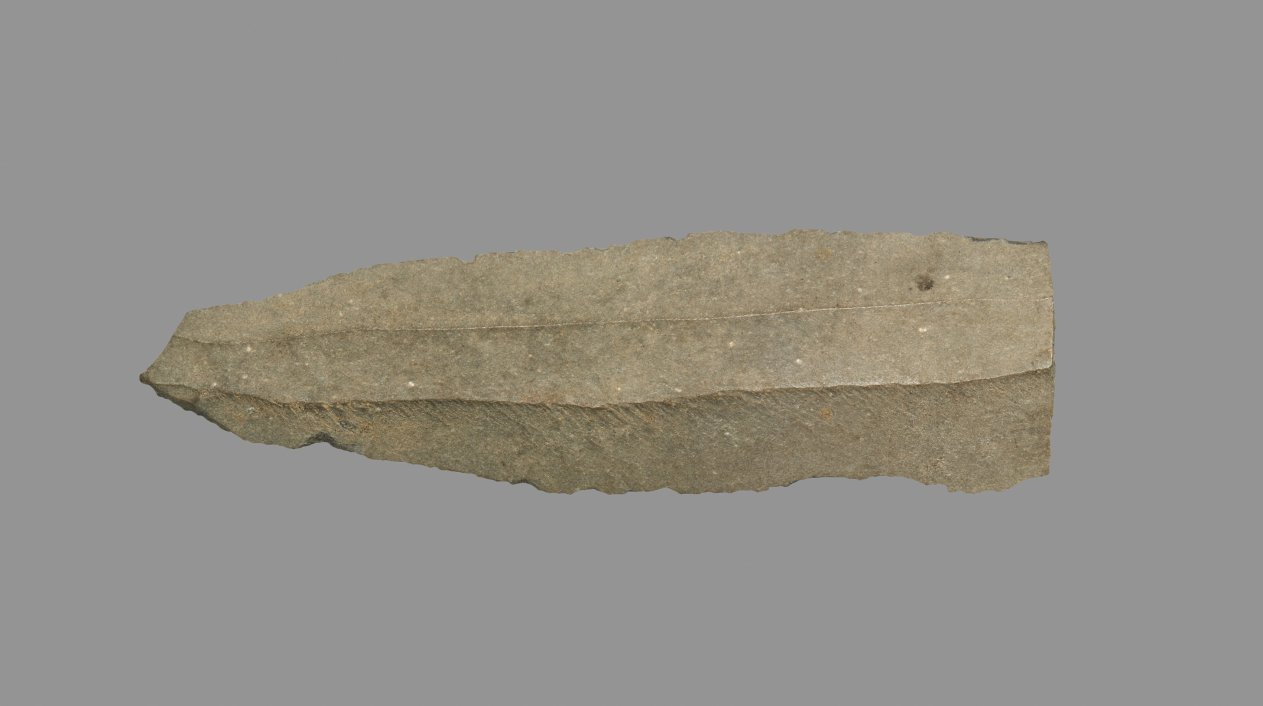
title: Sickle Blade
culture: Egypt, Middle Kingdom (2040–1648 BCE), Dynasty 12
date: 1980–1801 BCE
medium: flint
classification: Implements